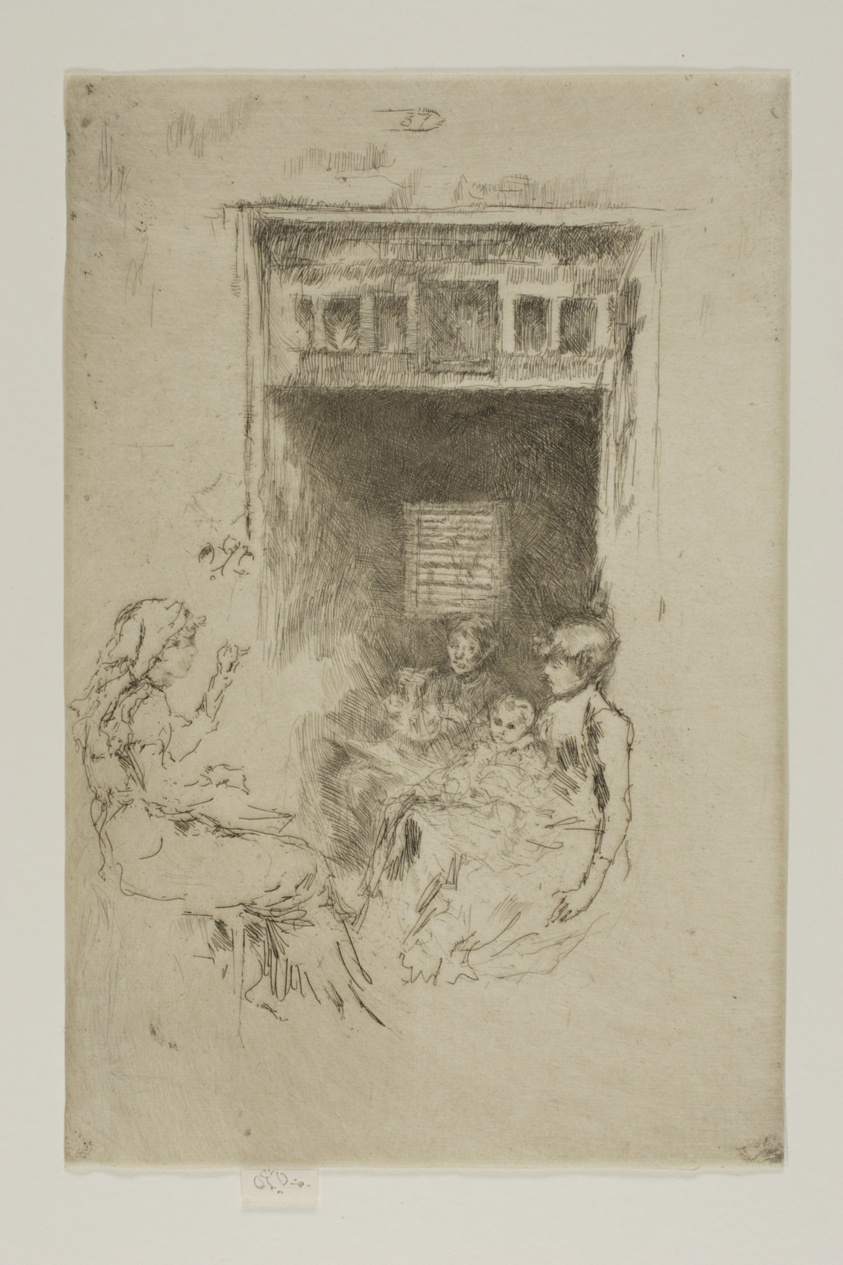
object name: Print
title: Bead Stringers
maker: James McNeill Whistler (American, 1834-1903)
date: 1880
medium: Etching and drypoint with foul biting in black ink on ivory laid paper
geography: United States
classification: etching; foul biting; print; prints and drawing; paper; drypoint